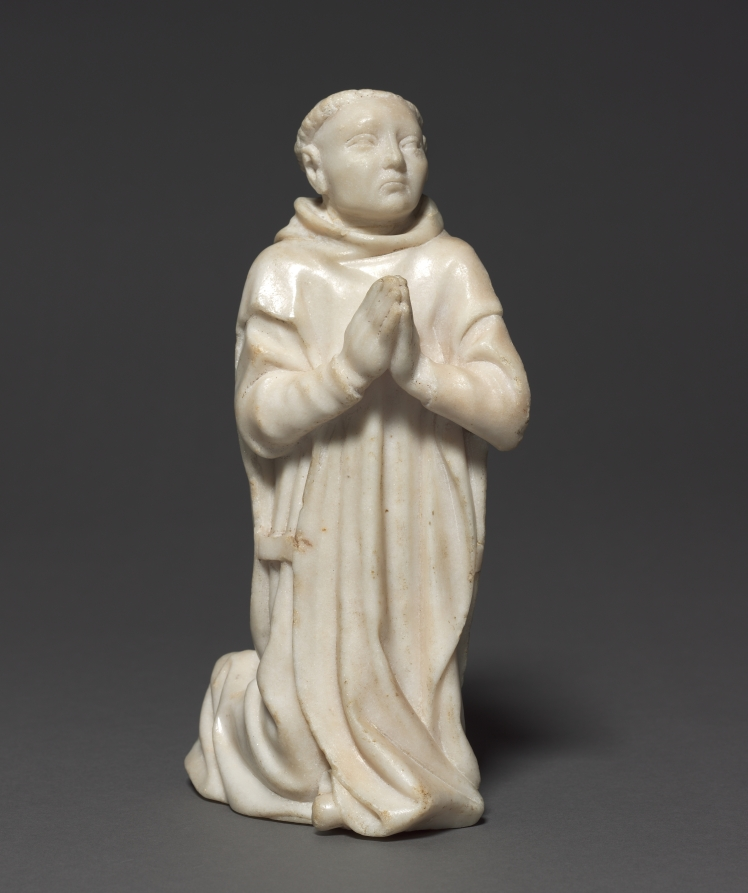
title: Kneeling Carthusian Monk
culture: France, Burgundy, Dijon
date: c. 1380–1400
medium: marble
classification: Sculpture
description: These are the only known surviving sculpted examples of kneeling Carthusian monks. Depictions of Carthusians in the same act of piety are found in paintings such as the one in this room from the Chartreuse de Champmol. These two figures are believed to come from the same Carthusian monastery as the mourners displayed nearby and would have formed part of a private devotional group, probably in a monk’s cell, with a sculpture of the crucified Christ or the Virgin positioned between them. They wear the recognizable white scapular, a hooded garment with front and back panels tied together with a tab.